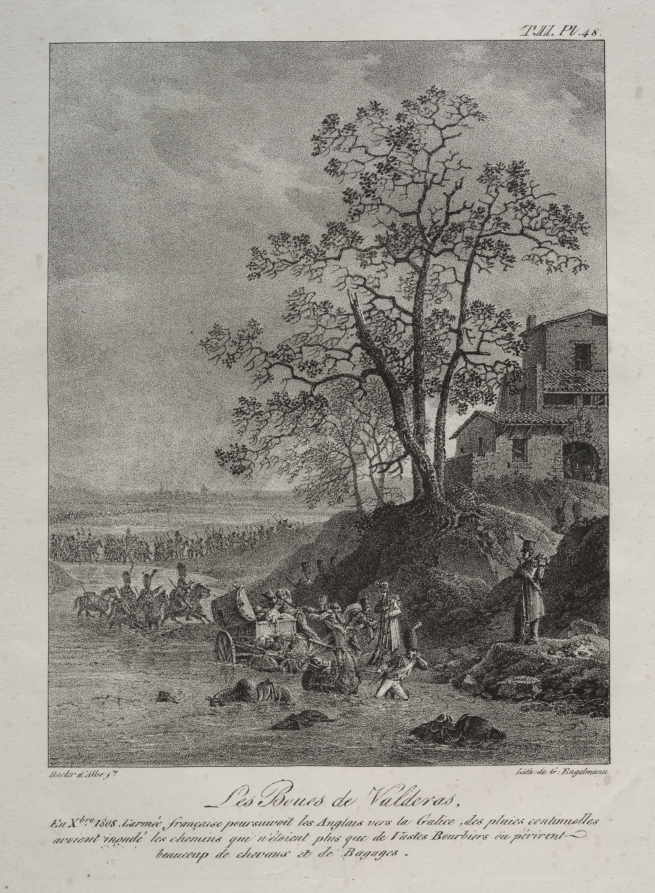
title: Spanish Campaign: The Mires of Valderas, Province of Leon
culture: France, late 18th-early 19th century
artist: Baron Louis Albert Guillain Bacler d'Alber (French, 1761–1824)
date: 1807–24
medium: lithograph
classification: Print